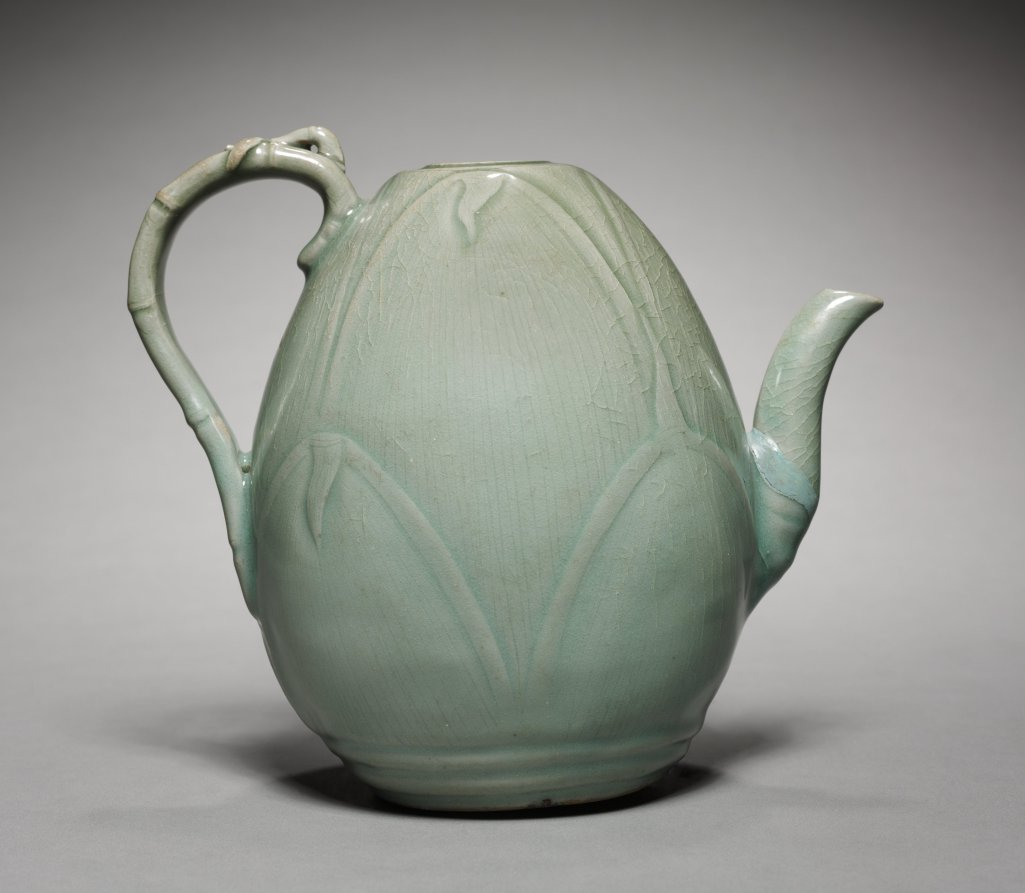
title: Wine Ewer with Incised Bamboo Shoot Design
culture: Korea, Goryeo dynasty (918–1392)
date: 1100s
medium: celadon ware with incised decoration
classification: Ceramic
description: Natural motifs inspired the shape of celadon vessels as well as their inlaid designs in the Goryeo period. This wine ewer is shaped like a bamboo shoot, but it also resembles a lotus bud. Even though the spout was repaired, the ewer is a masterpiece of Goryeo period celadon. Ewers of the same shape are now housed at the National Museum of Korea and the Museum of Oriental Ceramics, Osaka.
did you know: This type of ewer is supposed to have a tight-fitting lid, which is currently missing.